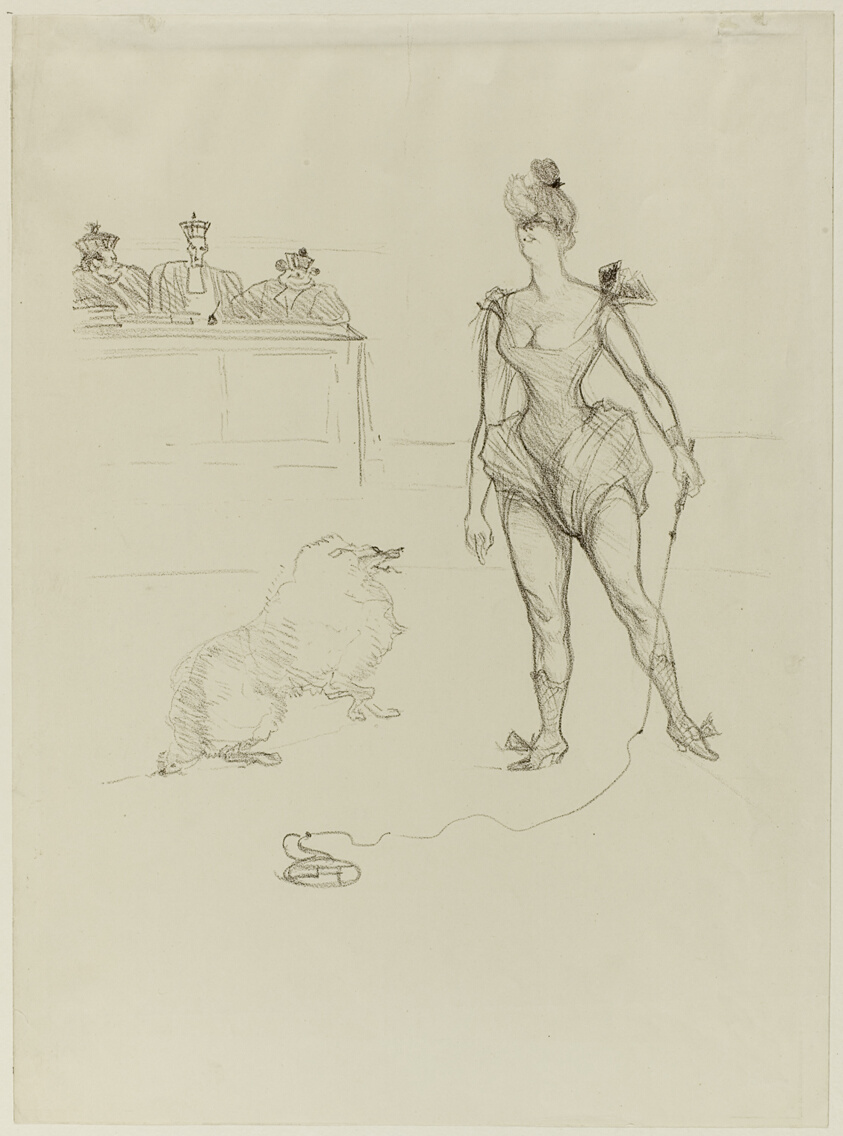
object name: Print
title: The Animal-Tamer before the Tribunal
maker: Henri de Toulouse-Lautrec (French, 1864-1901)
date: 1899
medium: Lithograph on cream wove paper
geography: France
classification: lithograph; print; prints and drawing